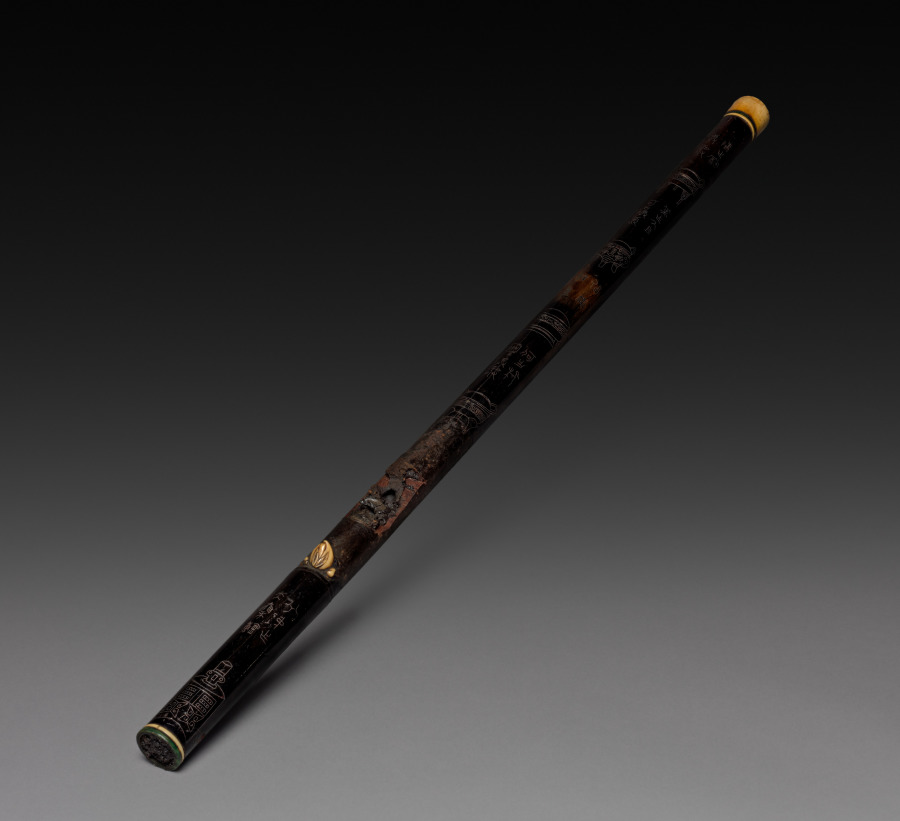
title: Opium Pipe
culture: China, Qing dynasty (1644-1911)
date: 1800s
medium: wood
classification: Miscellaneous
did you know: The pipe is decorated with images of archaic ritual bronzes.